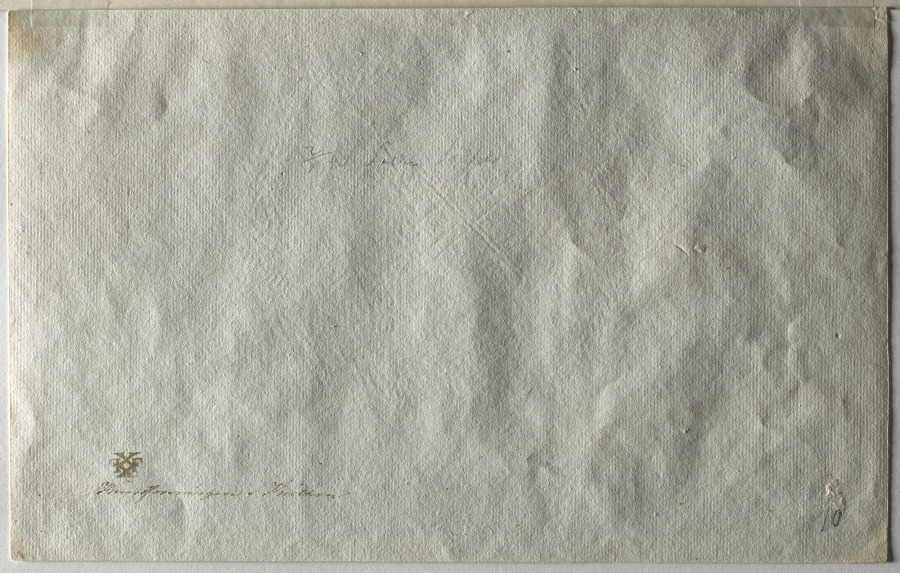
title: Asnæs Skov, Bay at Kalundborg Fjord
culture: Denmark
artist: Johan Thomas Lundbye (Danish, 1818–1848)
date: 1839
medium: Pen and black ink and gray and brown ink washes with arched framing line in pen and black ink, bordered in pink watercolor on modern cream laid paper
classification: Drawing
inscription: Inscribed and signed, black ink, lower left: Landskab ved Kallundborg Fjord. Asnæs Skov. Dec 1839. Johan Th Lundbye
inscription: inscribed, black ink, lower right: 2/1 1840 tilf. Fuldmagtig Secher i Kanders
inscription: Stamped, on verso, black ink, lower left: mark of Kunstforeningen (Lugt 988c)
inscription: inscribed, ink, lower left: Kunstforeningen København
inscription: inscribed, pencil, at center: 2/1 40 [illeg.] Secher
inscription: inscribed, pencil, lower right: 10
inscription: Watermark, at center: C&I HONIG / XX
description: Johan Thomas Lundbye belonged to the youngest generation of artists working during Denmark’s Golden Age, a period of unprecedented creative activity. This drawing depicts a wooded area on a narrow bay near the town where the artist grew up. Lundbye worked outdoors, directly from nature, aiming to create a work that conveyed his experience of nature. With exacting precision, he conveyed the scene’s solitude and featured a large dolmen, meant to allude to the region’s ancient past.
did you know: Copenhagen’s Kunstforeningen, an exhibition society for contemporary art, purchased this drawing from Lundbye shortly after its creation—a practice meant to extend the organization’s support of artists.